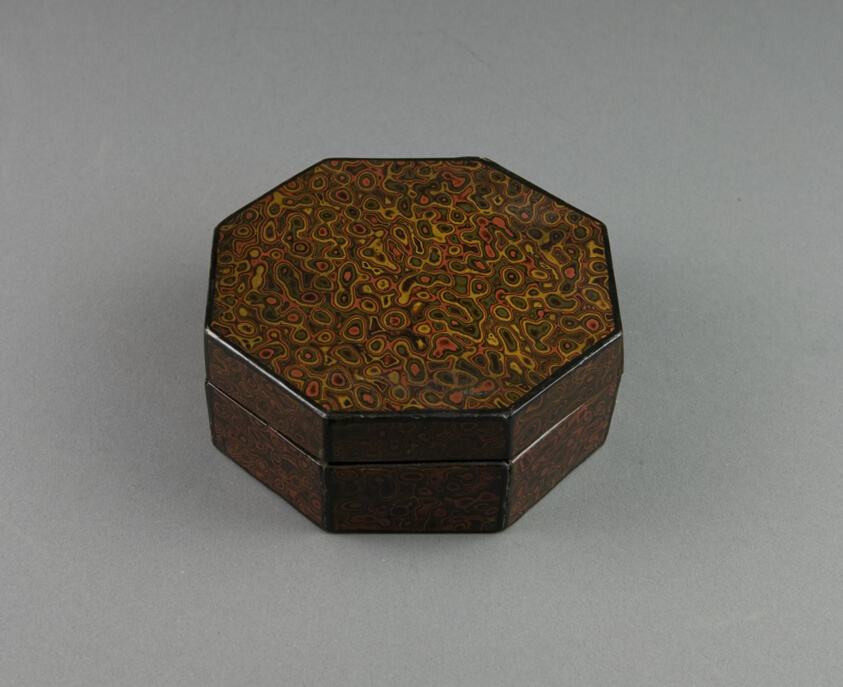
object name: Vessel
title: Octagonal Marbled Lacquer Box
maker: China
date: Qing dynasty (1644-1911)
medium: Marbled lacquer (xipi)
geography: China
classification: lacquerware; asian art